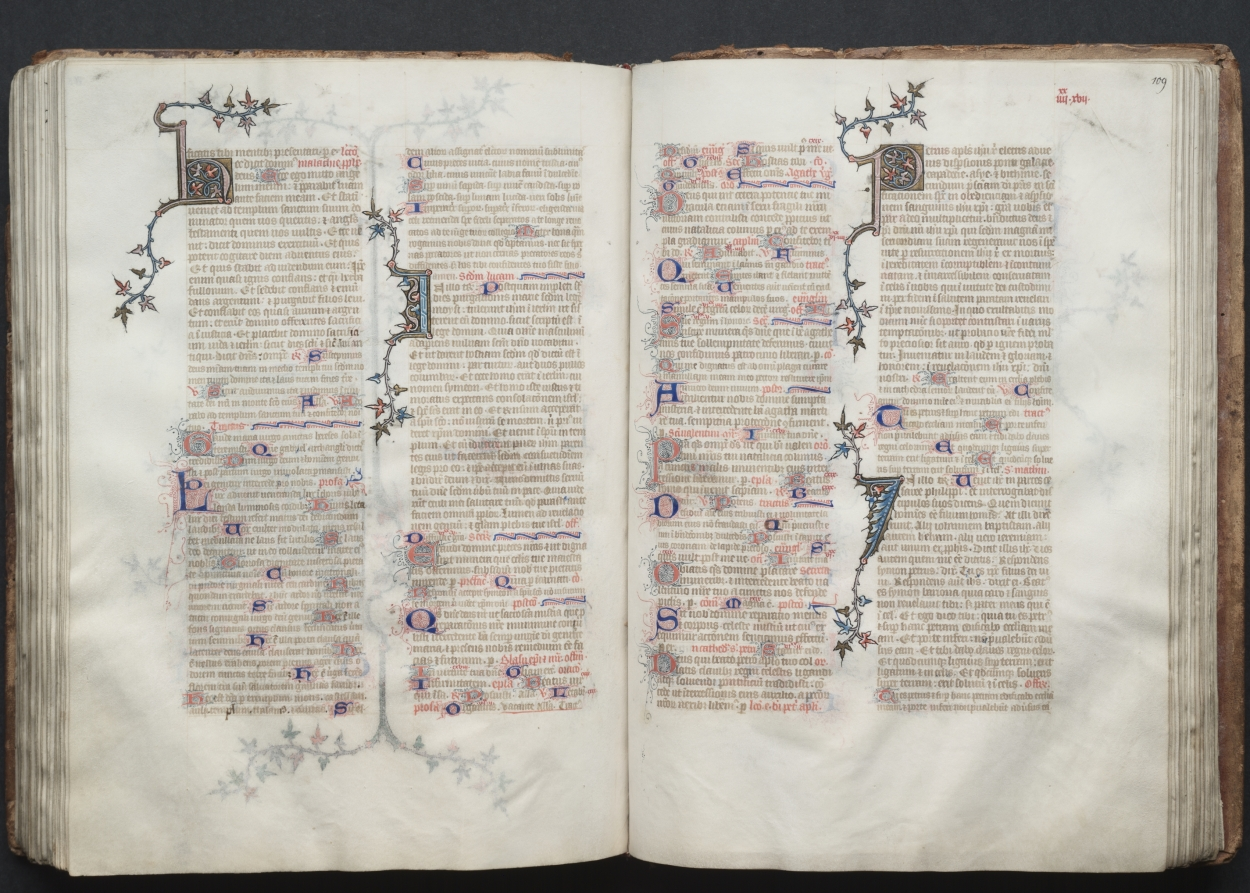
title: The Gotha Missal: Fol. 108v, Text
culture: France, Paris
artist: Master of the Boqueteaux (French)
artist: and Workshop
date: c. 1375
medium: ink, tempera, and gold on vellum; blind-tooled leather binding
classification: Bound Volume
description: The style and quality of this manuscript's decoration is typical of deluxe Parisian books made for aristocratic or royal patrons. Most of the book's decoration appears to be the work of the Master of the Boqueteaux, an artist active at the court of King Charles V (died 1380). His style was apparently shared by a number of book illuminators working in and around Paris. It is very possible that the Gotha Missal belonged to Charles V, but is not provable because the manuscript has no royal portraits and lacks a colophon. Given the book's magnificent decoration, however, it would seem that it was produced for a Valois prince, if not for the king himself. The manuscript receives its name from the German dukes of Gotha, its later owners.